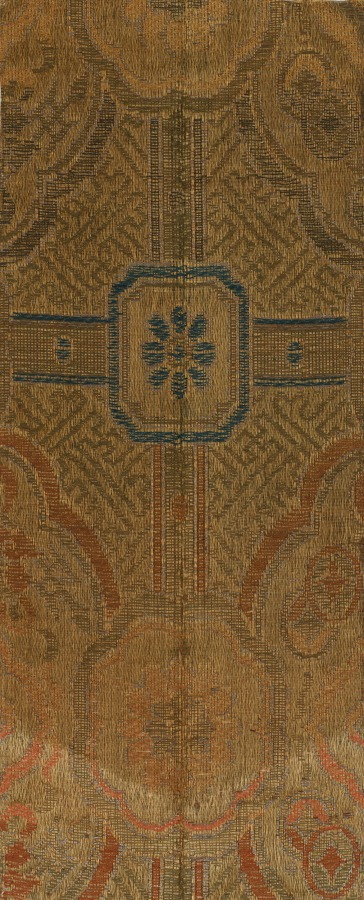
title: Fragment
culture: China, 19th century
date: 1800s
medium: silk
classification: Textile